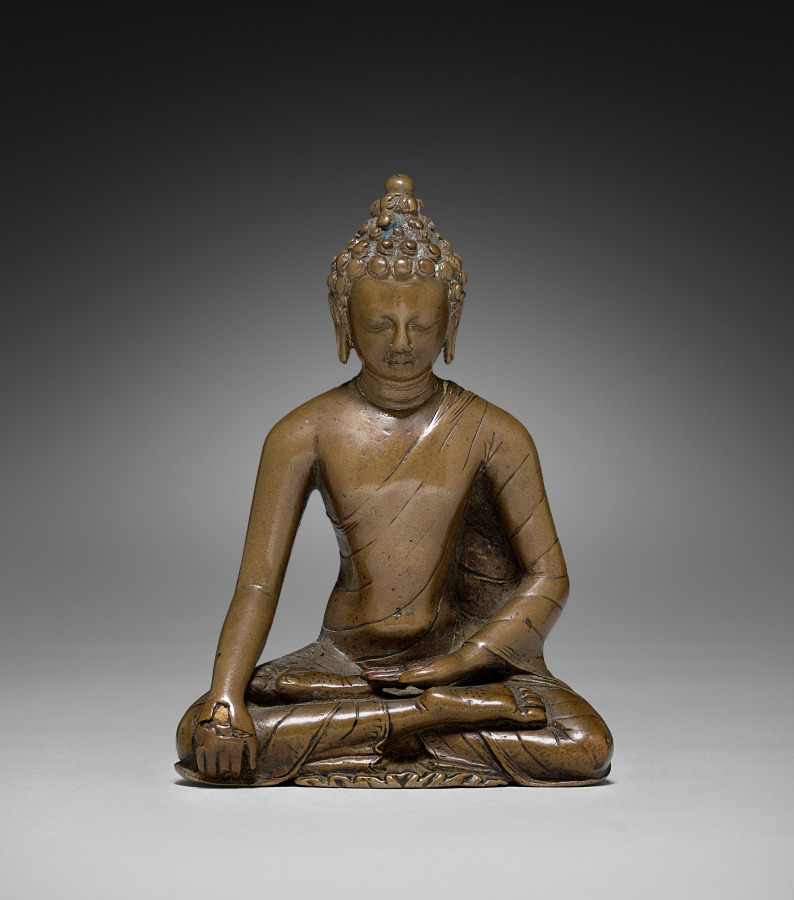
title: Seated Buddha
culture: India, Bengal(?), Pala period, 9th century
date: 800s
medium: bronze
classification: Sculpture